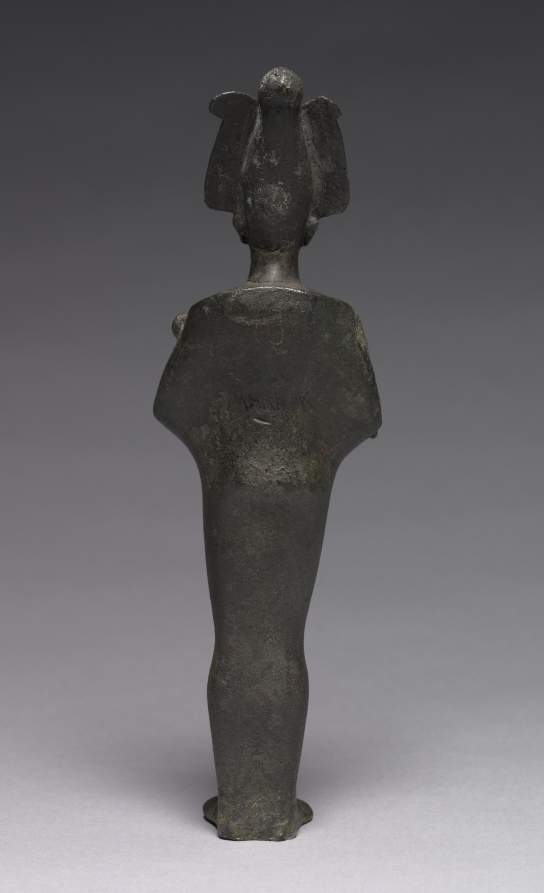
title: Statuette of Osiris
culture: Egypt, Late period (715–332 BCE), Dynasty 26 or later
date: 664–30 BCE OR 664–330 BCE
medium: bronze, body solid cast, head hollow cast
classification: Sculpture